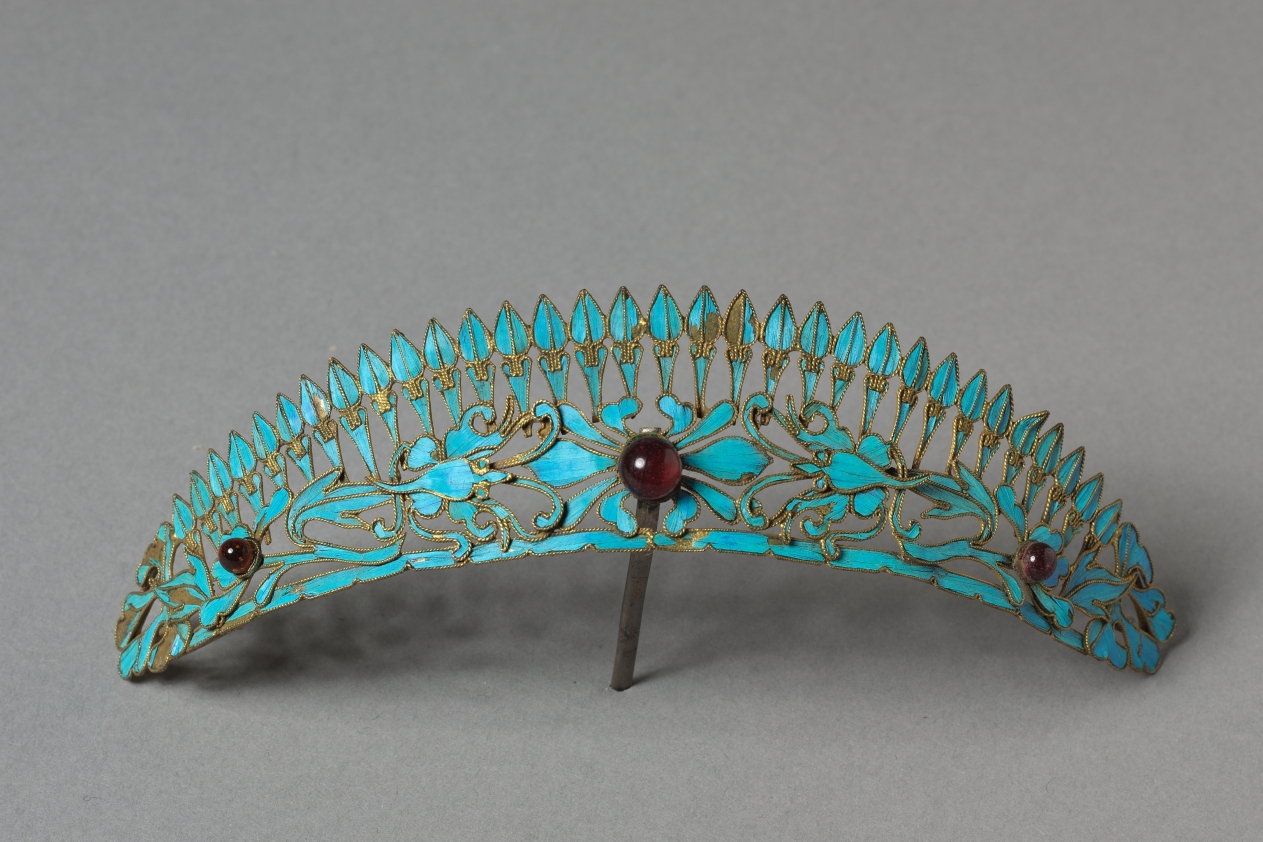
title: Headdress Ornament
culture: China, Qing dynasty (1644-1911)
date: 1800s–1900s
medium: Copper-silver alloy, gilding, kingfisher feathers, glass beads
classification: Jewelry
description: Hair ornaments depicting flowers, butterflies, or birds were worn by ladies of the Manchu elite class.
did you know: The iridescent blue feathers of kingfisher birds are inlaid in hairpins and headdresses.